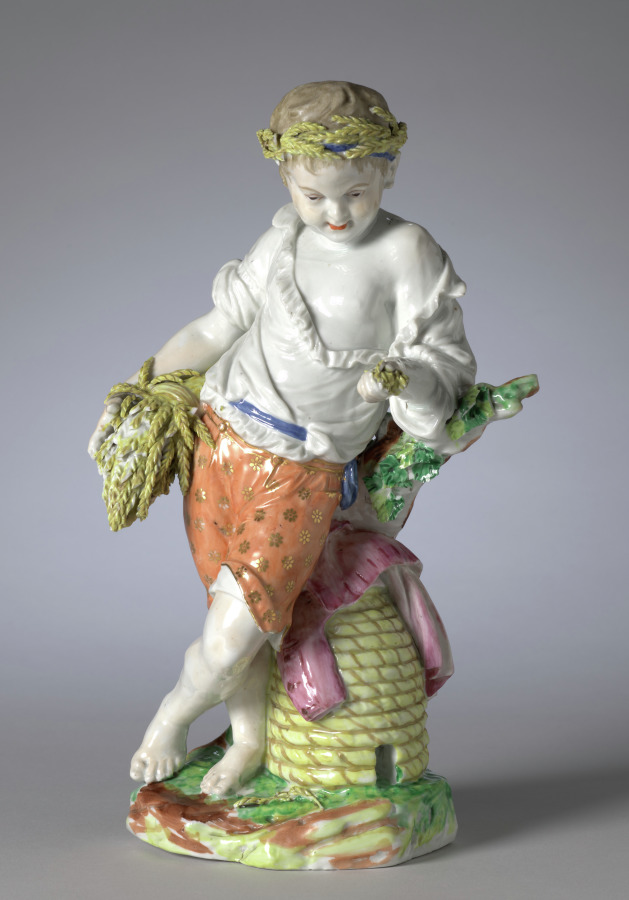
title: Figure of Summer from the Four Seasons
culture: England, Bristol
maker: Bristol Porcelain Factory (British, 1770–81)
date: c. 1775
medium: hard-paste porcelain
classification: Ceramic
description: The modern notion of childhood as a time of innocence and simplicity emerged during the second half of the eighteenth century. This understanding of adolescence led to numerous depictions of children as personifications of the four seasons. Here summer is portrayed as a young boy holding a sheaf of wheat as he leans against the beehive next to him. Both grain and honey have been associated with summer harvests and their accompanying festivals since antiquity.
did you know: Allegorical figures most often decorated a table during the dessert course, providing amusing subjects for conversation.